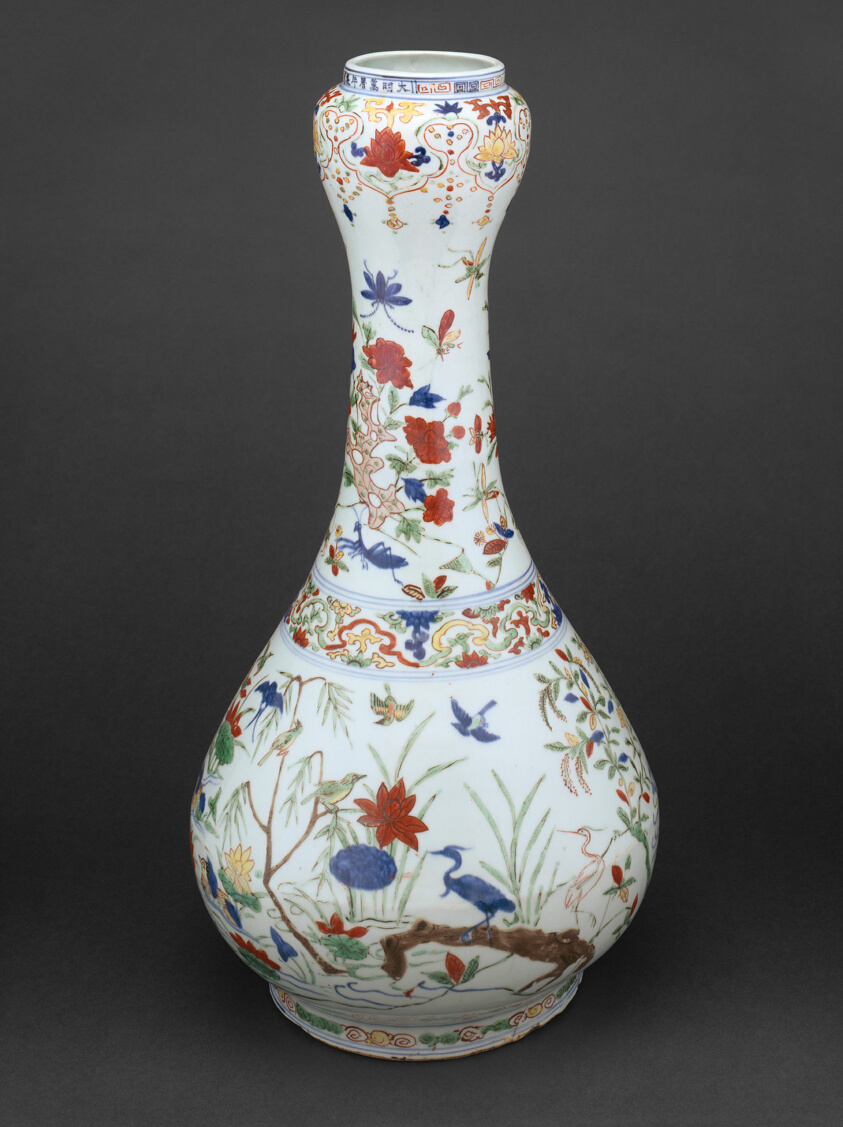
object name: Vessel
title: Garlic-Shaped Bottle with Mandarin Ducks and Birds in a Lotus Pond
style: Chinese (culture or style)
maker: China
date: Ming dynasty (1368–1644), Wanli reign mark and period (1573–1620)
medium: Porcelain painted in underglaze blue and overglaze polychrome enamels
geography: China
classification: porcelain; asian art; ceramics; vessel